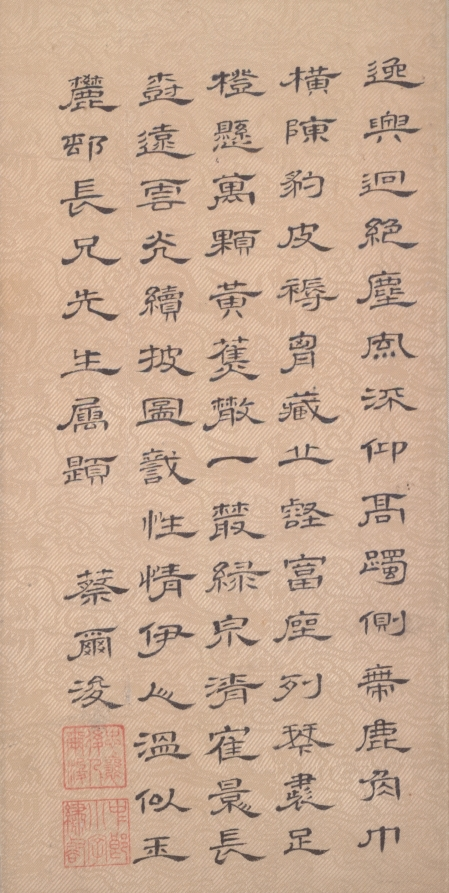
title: Portrait of An Qi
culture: China, Qing dynasty (1644-1911)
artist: Wang Hui (Chinese, 1632–1717)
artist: Tu Luo (Chinese, active c. 1715)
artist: Yang Jin (Chinese, 1644–1728)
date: 1715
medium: hanging scroll; ink and color on paper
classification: Painting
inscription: [印]上下千年. 麓村高逸：康煕乙未季春，廣陵涂洛寫照，海虞楊晉布景，八十四叟王翬補竹石。[印]耕煙; 王翬之印.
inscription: 俯視塵寰逸韻高，襟懷潚灑興偏豪。/ 琴書座右親風雅，竹石池邊拭羽毛。/ 蕉葉亂雲遮北礀，鶴翎凝雪戀東皋。/ 翩翩度量如君少，靜對秋江萬斛濤。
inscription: 知君頗好道，作意洗緐縟。/ 遂窮林亭勝，翛然契幽獨。/ 自得會忘言，餘善時往復。/ 岸幘若有期，把卷一停讀。/ 鶴馴行載正，雲閑斷還續。/ 橘柚欎寒煙，芭蕉瀉深綠。/ 石橋逕屢迴，暗水流亦曲。/ 真心恣奇探，曠景縱遐矚。/ 陶謝不可作，此旨更誰屬。/ 眷焉展斯圖，令我怡心目。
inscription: 逸興迥絶塵，風流仰高躅。/ 側無鹿角巾，横呈豹皮褥。/ 胸藏山壑富，座列琴囊足。/ 橙懸萬顆黄，蕉散一叢綠。/ 泉清鶴景長，樹遠雲光續。/ 披圖識性情，伊人温似玉。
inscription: 風雅出塵寰，披圖見一斑。/ 橘香新雨後，竹影夕陽間。/ 流水鳴前澗，歸雲渡遠山。/ 幽棲如可遂，應許共追攀。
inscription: 蕭灑披襟坐，琴書逸興長。/ 衫分蕉葉碧，冠學竹皮黄。/ 高樹穿雲斷，流泉帶菊香。/ 幽懷真曠達，何地不羲皇。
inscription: 秋色滿林壑，孤琴獨玄閒。/ 境歸簪紱外，道在水雲間。/ 棄智如藏璞，栖心静若山。/ 看君此圖畫，永以謝塵顏。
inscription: 修竹叢蕉坐綠天，君容早歳已如仙。/ 山中寄謝王摩詰，頭白方知住輞川。/ 千樹勝封萬戸侯，西風載滿李衡舟。/ 看君高致輕軒冕，坐享江鄉富貴秋。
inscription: 6 seals unidentified.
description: An Qi, the subject of the portrait, was a second-generation salt merchant from Korea. He used part of his wealth to collect art. At the time this painting was commissioned, An was less than 40 years old. He is represented as a Daoist recluse in nature, informally dressed with attributes such as books and a wrapped guqin instrument, a portrait convention for literati-scholars since the Six Dynasties period (220–589 CE). The local Taihu rock, banana plants, and crane suggest a southern garden and a life in seclusion. An’s portrait is evidence of merchants aspiring to the scholar-official class. According to the inscription, this painting was the joint effort of three men, the eldest and most famous was Wang Hui. While the garden setting is homogenous in style, it contrasts with the application of opaque pigments and shading employed for the depiction of An Qi’s face.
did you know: Seven of An Qi's close friends wrote poetic inscriptions on the silk brocade mount around his portrait.